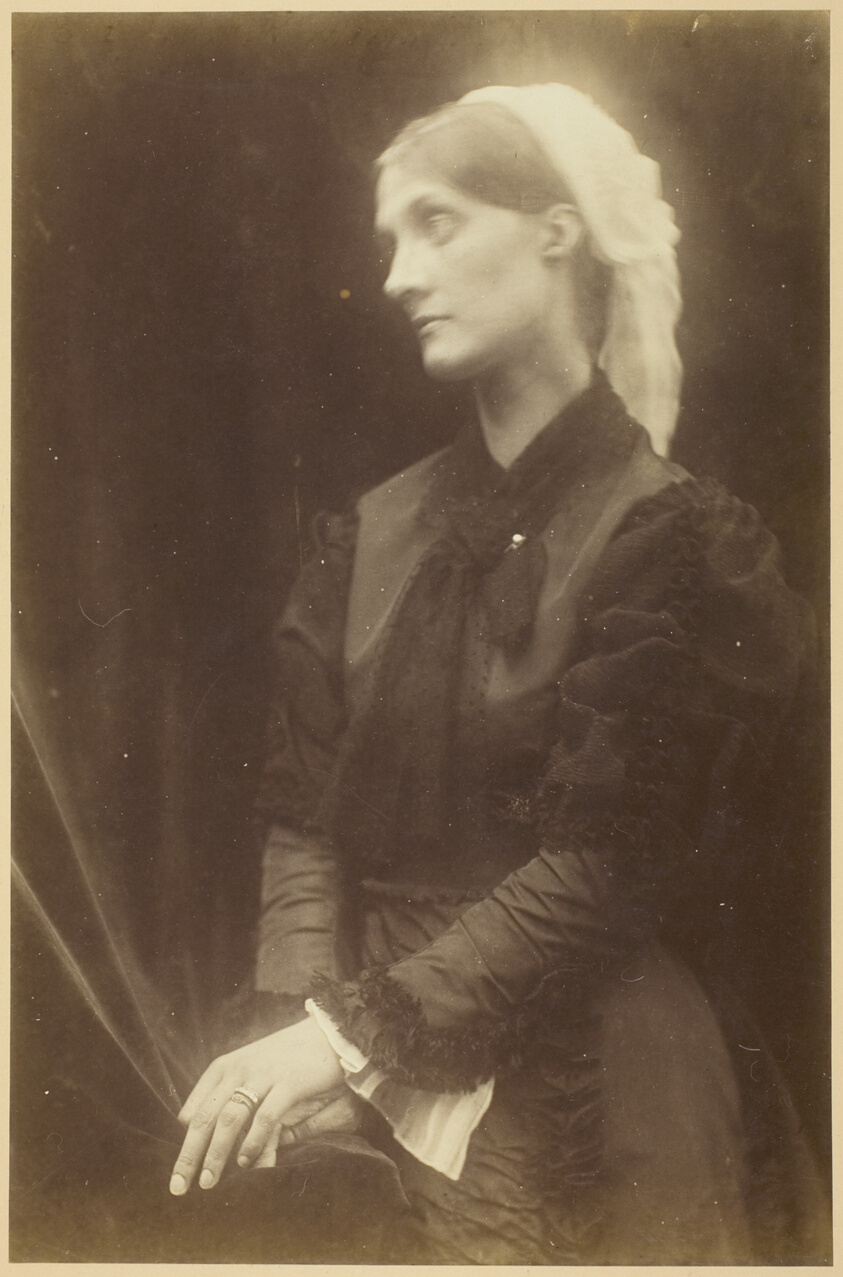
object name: Photograph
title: Julia Jackson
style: 19th century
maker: Julia Margaret Cameron (English, 1815–1879)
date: September 1874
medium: Albumen print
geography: England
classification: albumen silver print; photographic process; photography; photograph